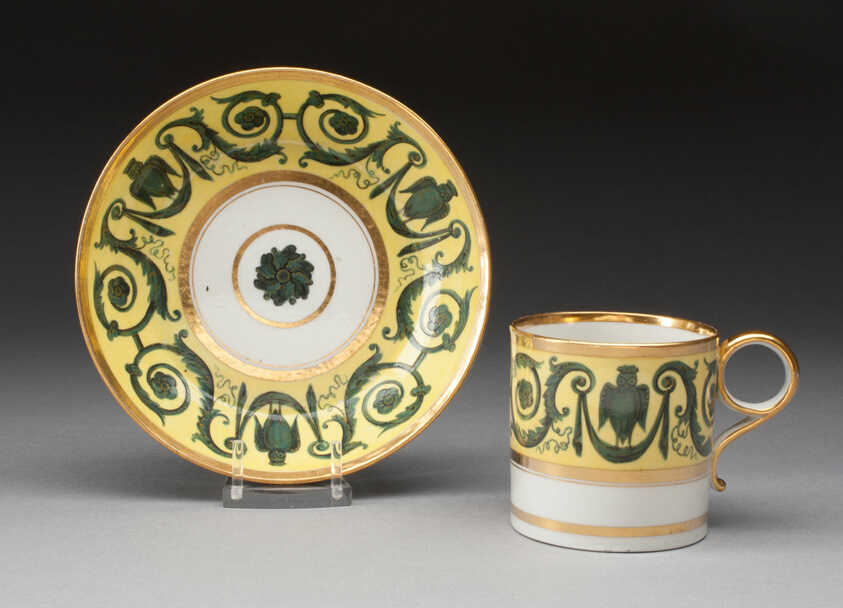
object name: Ceramics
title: Coffee Cup and Saucer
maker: Worcester Porcelain Factory (Barr, Flight & Barr Period, 1804–1813); Worcester, England, founded 1751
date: 1804–1813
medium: Soft-paste porcelain with polychrome enamels and gilding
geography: Worcester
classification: drinking vessel; teaware; porcelain; european decorative arts; ceramics